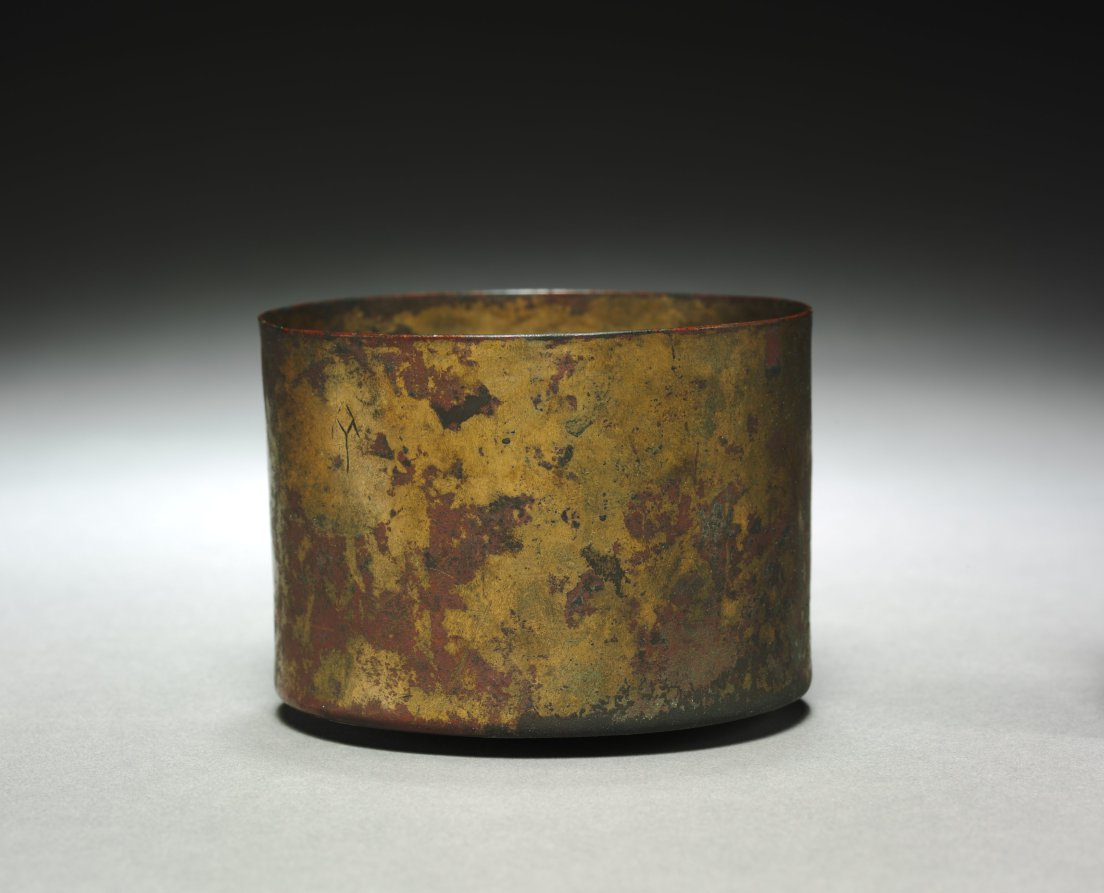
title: Cylindrical Bowl or Jar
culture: Egypt, Roman Empire or modern forgery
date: 30 BCE–395 CE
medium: bronze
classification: Vessels